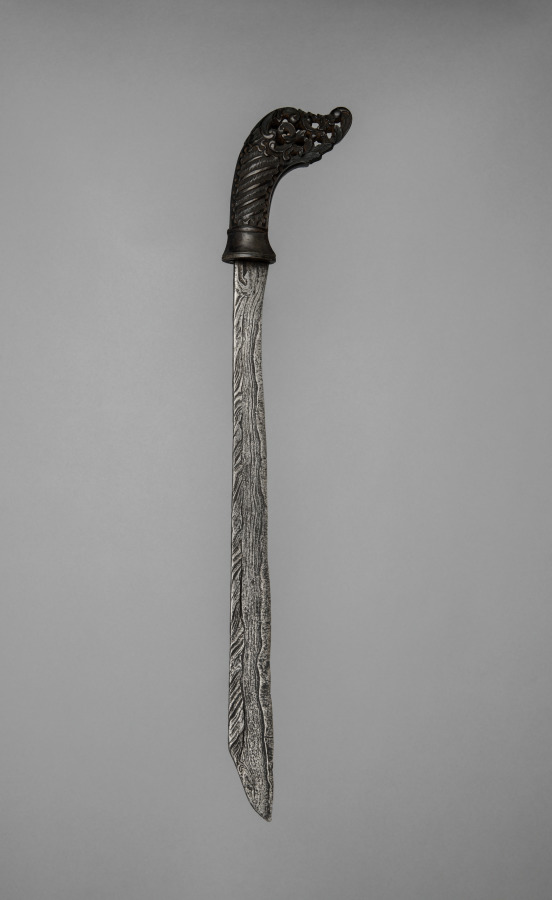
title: Sword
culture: Indonesia, Sulawesi (Celebes)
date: before 1916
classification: Arms and Armor